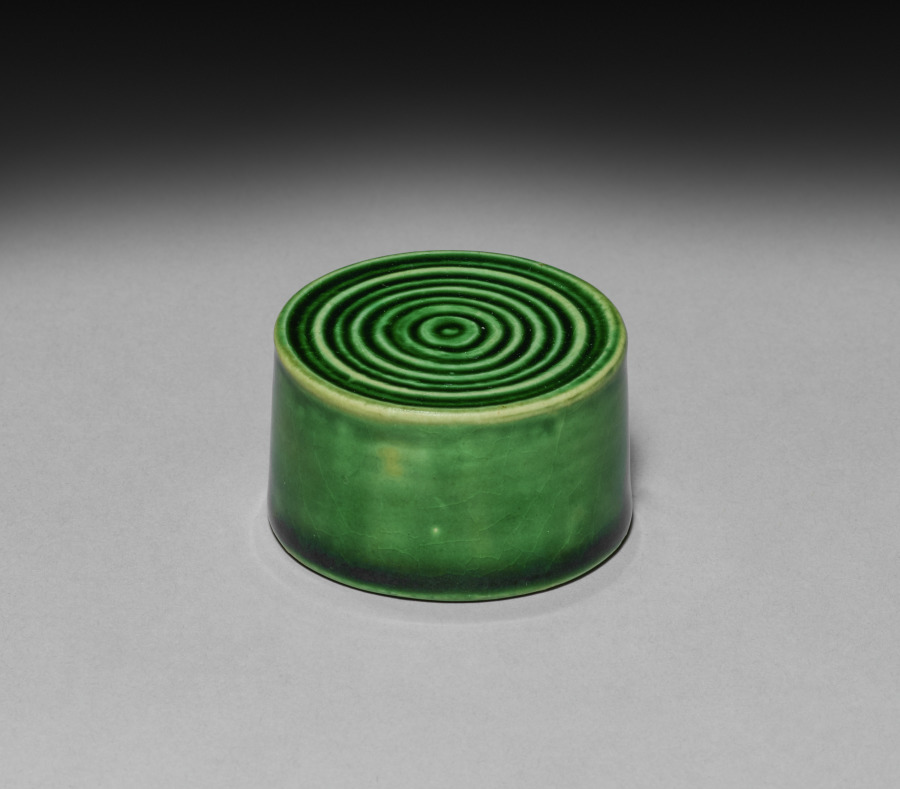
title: Cover for a Tea Caddy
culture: England, 18th century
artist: Staffordshire Factory (British)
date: c. 1750–1800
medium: earthenware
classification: Ceramic